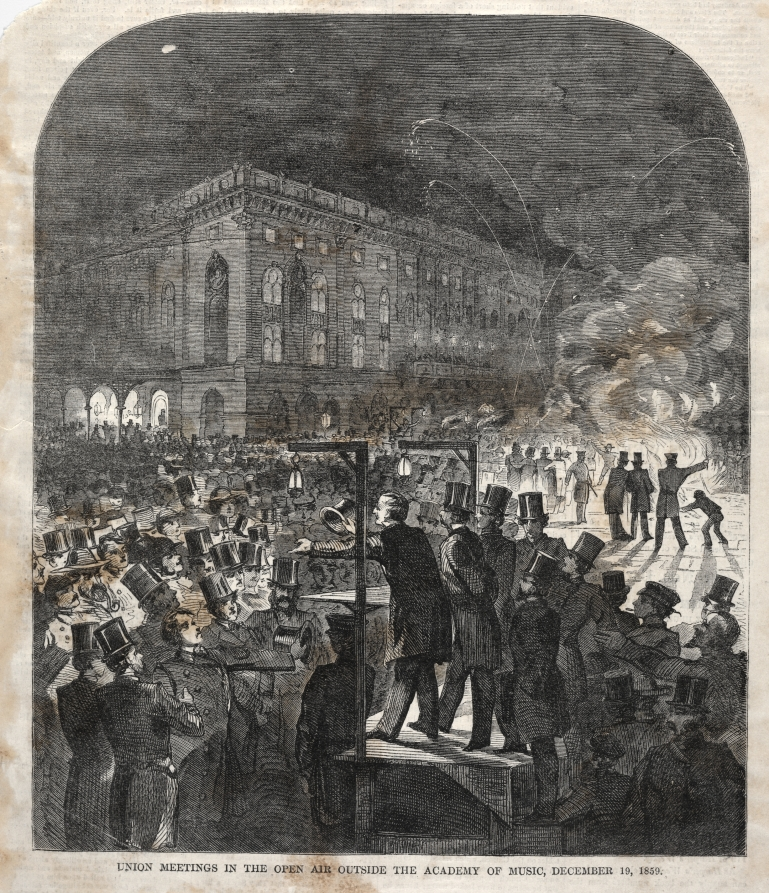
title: Union Meeting in the Open Air Outside the Academy of Music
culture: America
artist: Winslow Homer (American, 1836–1910)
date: 1859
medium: wood engraving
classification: Print